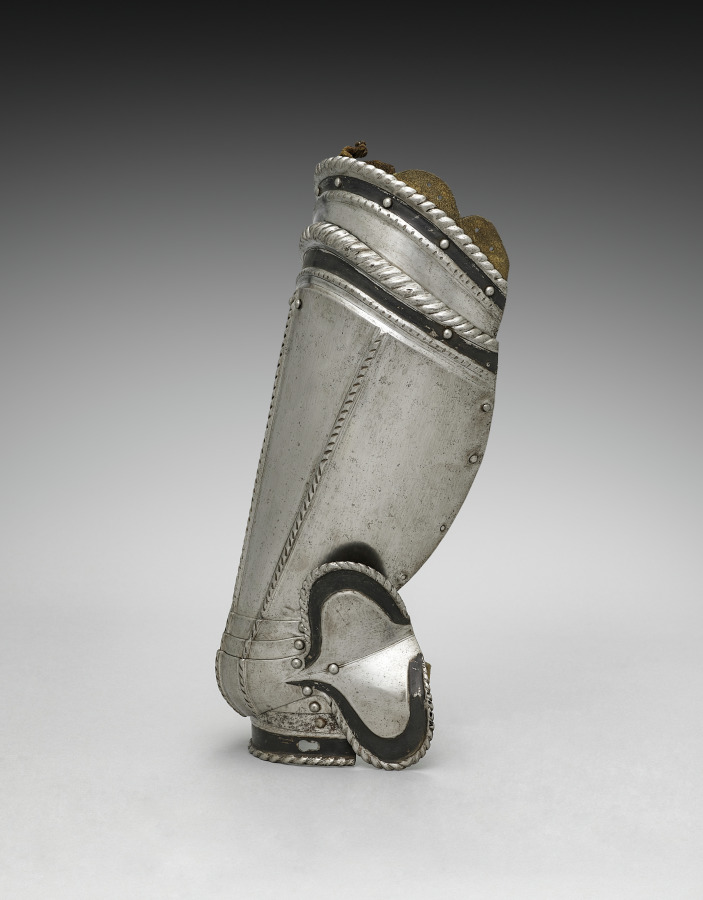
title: Left Cuisse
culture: Germany, 19th century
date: 1801–1900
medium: steel with black paint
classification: Arms and Armor